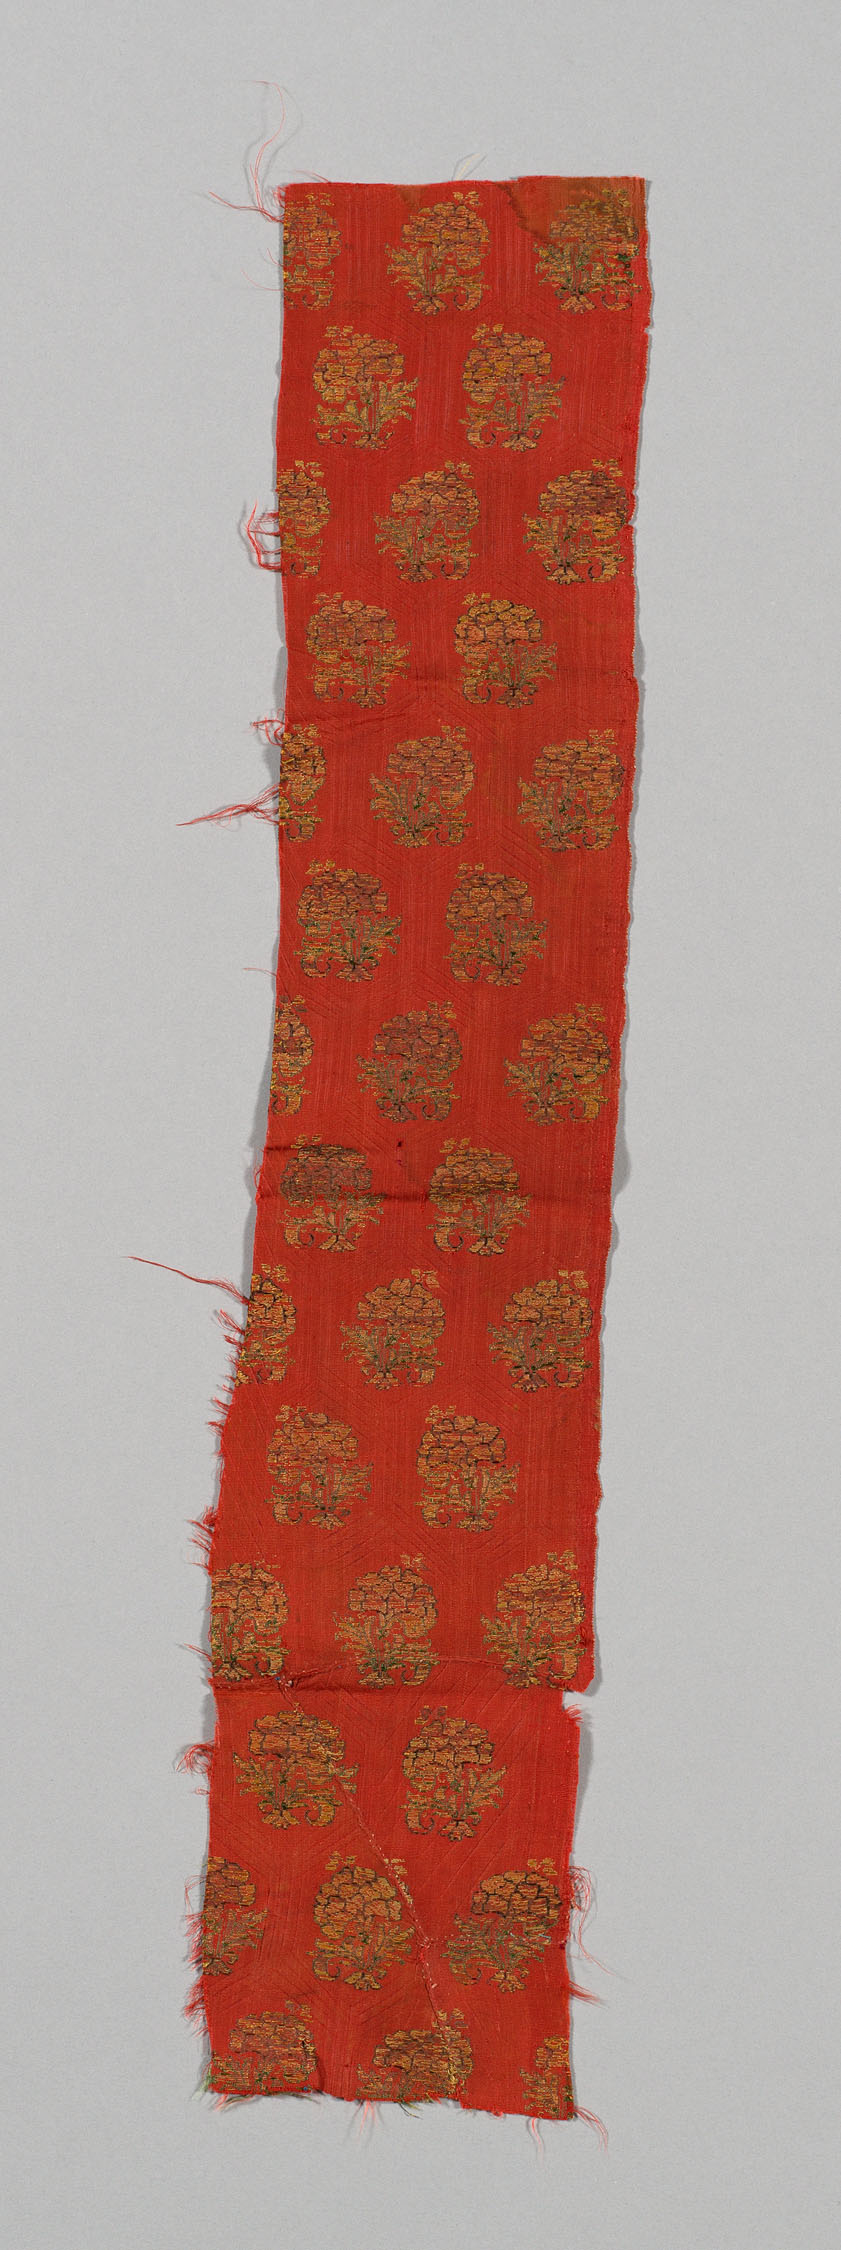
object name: Textile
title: Fragment (Dress Fabric)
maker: Near East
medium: Silk and gilt strip; warp-faced, weft-rib plain weave with supplementary brocading wefts; pressed pattern in ground weave; four pieces joined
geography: Middle East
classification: textile; weaving